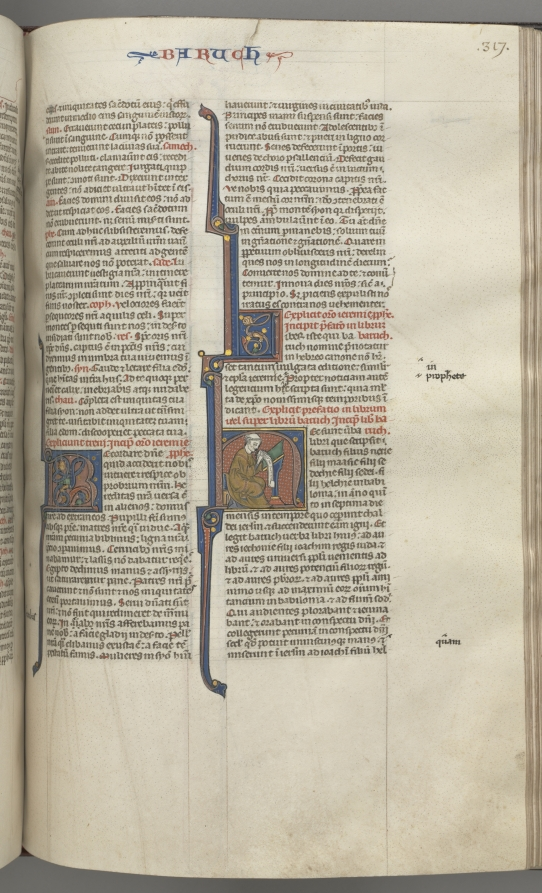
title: Fol. 317r, Baruch, historiated initial H, Baruch seated at a desk writing on a scroll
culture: Southern France, Toulouse(?), 13th century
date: c. 1275–1300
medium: ink, tempera and gold on vellum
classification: Bound Volume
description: Biblical manuscripts were highly prized and important possessions of churches, monasteries, cathedral schools, and universities throughout medieval Europe. The biblical texts were known as the vulgate, the translations made by Saint Jerome in the fourth century from Hebrew and Greek into Latin, which became the definitive and official Latin version of the Roman Church. In the 13th century, the bible was, for the first time, produced as a single volume with an officially sanctioned sequence to its books and chapters as illustrated by this example. The very extensive decoration of this bible is arranged hierarchically to indicate the relative importance of the various texts so that full or almost full-page initials mark the openings of the first prologue, Genesis, and the first Gospel; historiated initials mark the beginning of each book and illuminated initials mark the Prologues.